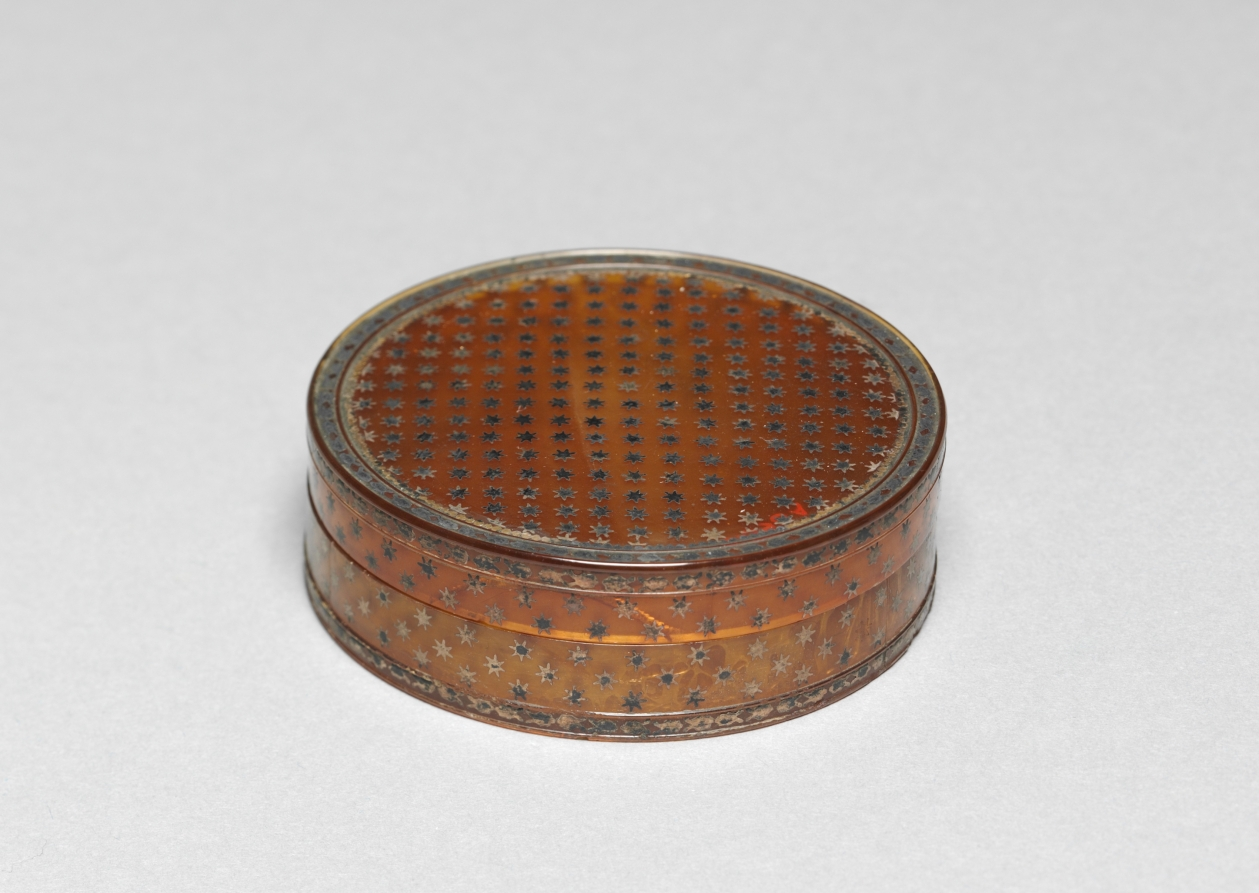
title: Box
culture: France, late 18th century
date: late 1700s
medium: horn with gilded piqué decoration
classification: Miscellaneous